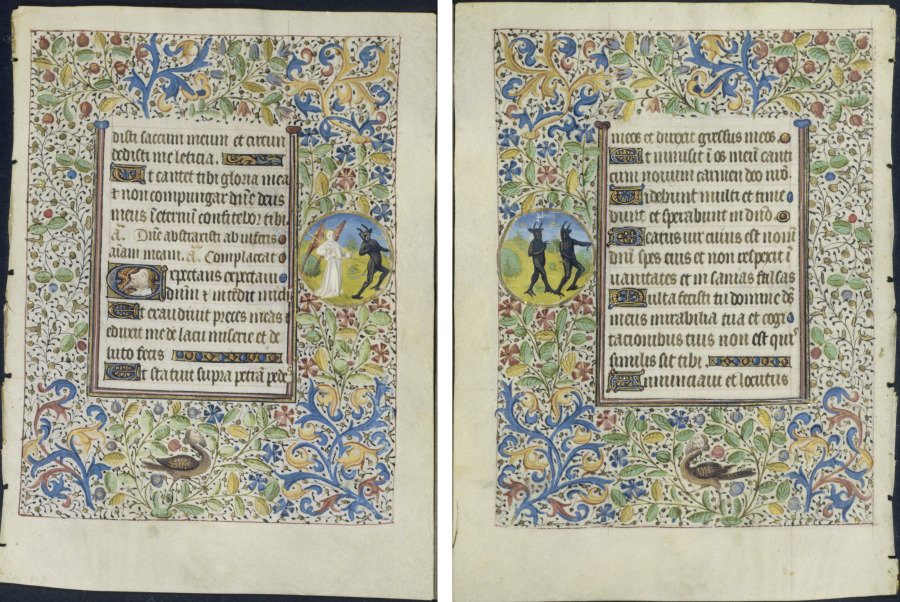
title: Leaf from a Book of Hours: Office of the Dead: Angel Chasing a Devil (recto) and Two Devils (verso)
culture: France, Paris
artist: circle of Coëtivy Master (French)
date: c. 1460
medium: ink, tempera and gold on vellum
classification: Manuscript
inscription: [consci]disti saccum meum et circum- dedisti me Laetitia. Ut cantet tibi gloria mea Et non conpungar Domine deus Meus in aeternum confitebor tibi. Ant. Domine abstraxisti ab inferis Animam meam. Ant: Complaceat. Et exaudivit preces meas: et eduxit me de lacumiseriar, et de luto faecis. Et Statuit supra petram Pedes… …meos: et direxit gressus meos. Et inmisit in os meum canti- Cum novum carmen Deo nostro. Videbunt multi et time- Bunt et sperabunt in Domino. Beautus vir cuius est nomen Domini spes ipsius et non respexit in Vanitates et insanias falsas. Multa fecisti tu Domine Deus meus mirabilia tua et cofi- tationibus tuis non est qui similissit tibi. Adnuntiavi et locutus…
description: The elaborate floral and foliated borders of this leaf, decorating the top, bottom, and sides of both recto and verso, contain four separate elements: blue and gold acanthus leaves, gold-leaf ivy vines, sprays of flowers or fruit, and a grotesque. Here the margin prominently includes an illuminated roundel with an angel chasing a devil with a lance. As a time-saving device, illuminators in the 1450s and later would often paint identical borders on both sides of a leaf. The motifs would be drawn on one side and then traced on the other by holding the leaf against a window. The manuscript from which this leaf came is no longer intact. It included numerous painted roundels relating to the lives of Saint Catherine of Alexandria and the more obscure Saint Alexis. It is possible that the manuscript originally belonged to a married couple for whom these saints served as patrons.